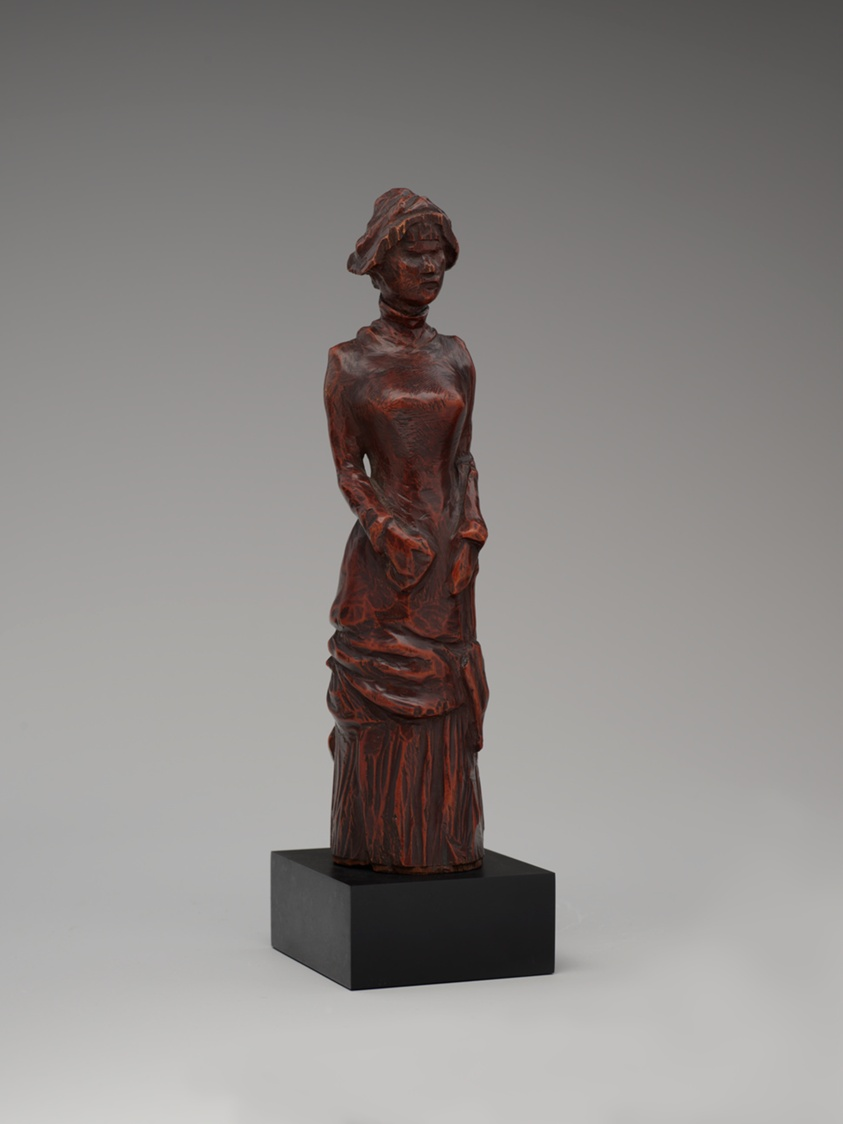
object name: Sculpture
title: Woman Strolling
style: 19th century, Post-Impressionism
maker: Paul Gauguin (French, 1848–1903)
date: c. 1880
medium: Tropical laurel (Terminalia), stained red and black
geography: France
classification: sculpture; european decorative arts; france; french; wood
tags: woman, figure, black (color), red (color), wood, sculpture, fashion, walking